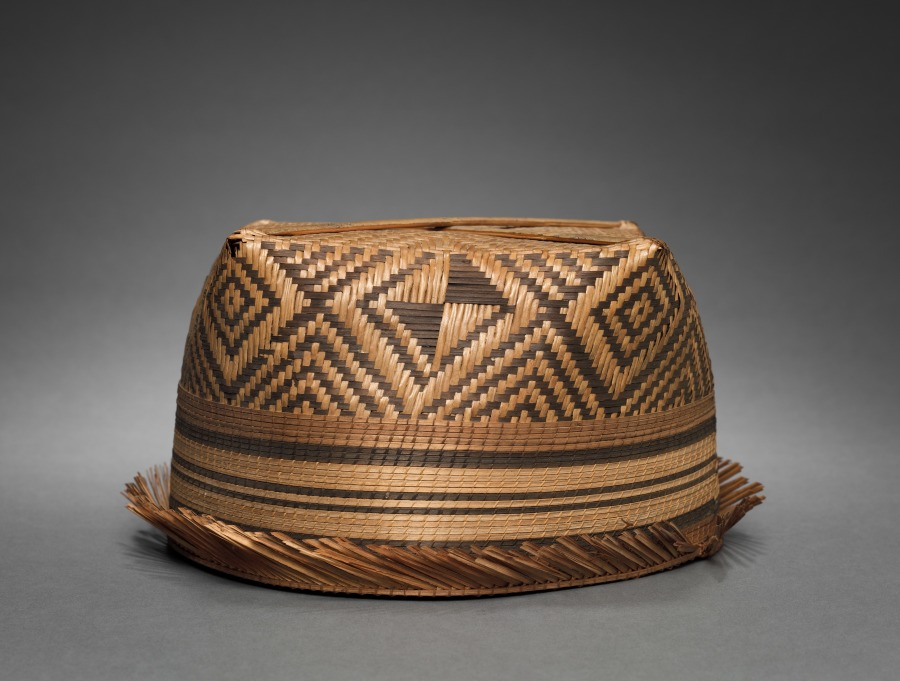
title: Hat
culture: Africa, Central Africa, Democratic Republic of the Congo, Mangbetu-style maker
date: by 1928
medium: Plant fibers and dye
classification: Garment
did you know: This woven hat looks brand new because it was one of the many items the business-savvy chief of Ekibondo had artists and artisans make for the foreigners who passed through his village.